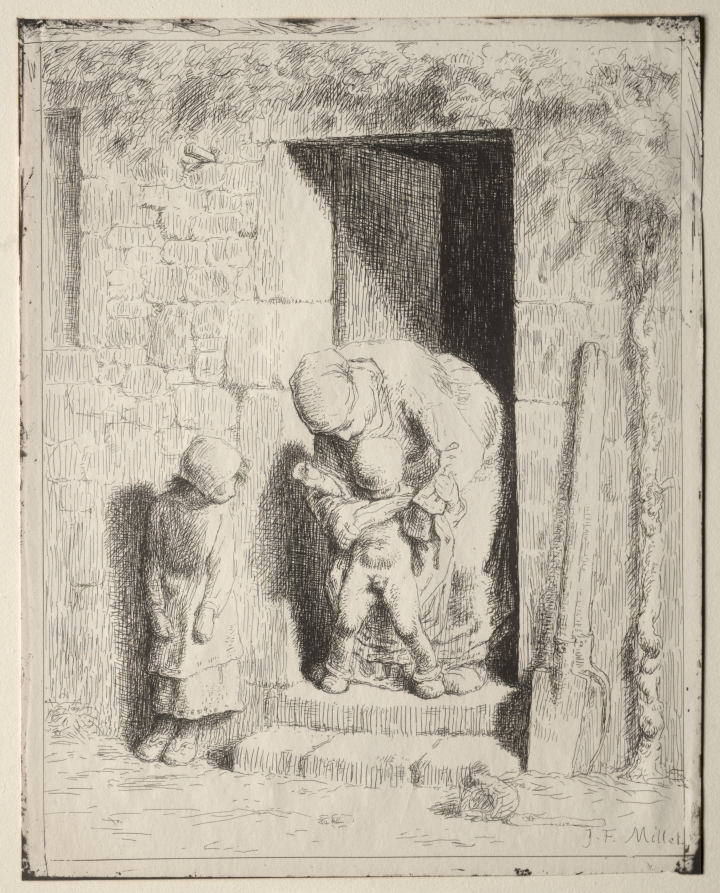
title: Maternal Precaution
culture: France, 19th century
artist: Jean-François Millet (French, 1814–1875)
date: 1860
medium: cliché-verre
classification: Print